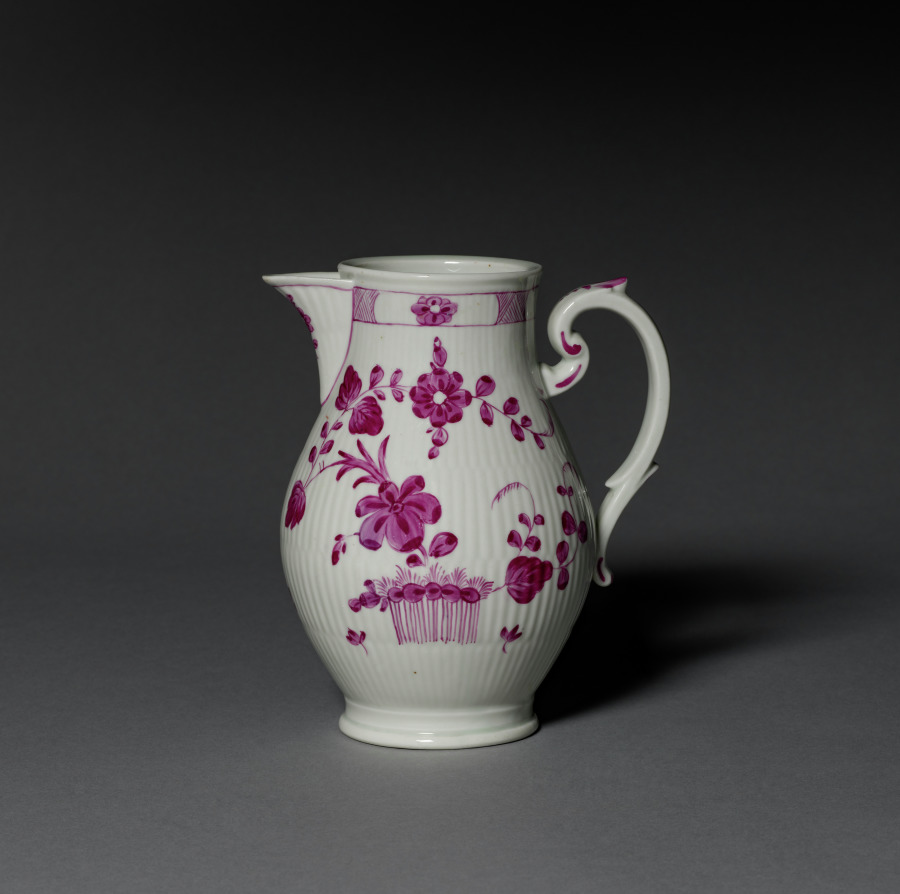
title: Chocolate Pot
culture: Germany, Berlin, late 18th century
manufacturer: Royal Porcelain Manufactory, Berlin (German)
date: late 1700s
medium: porcelain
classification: Ceramic